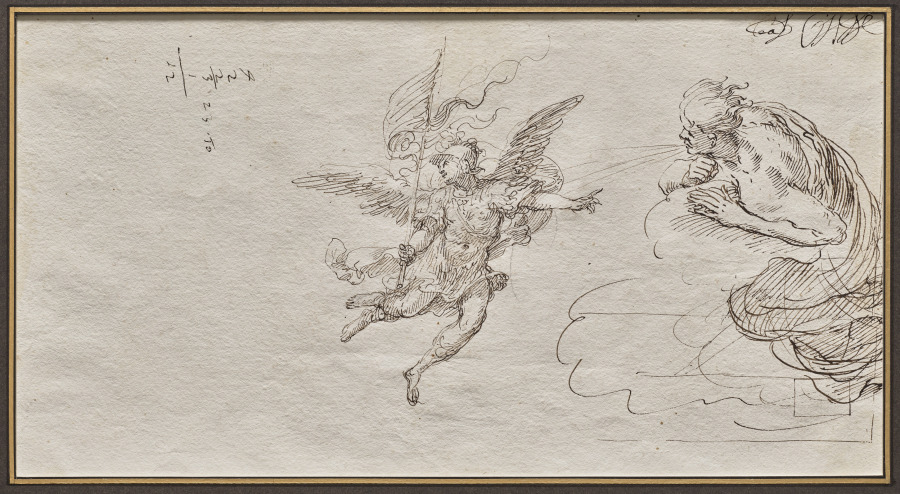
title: Studies of an Archangel and a Wind God (verso)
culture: Italy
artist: Massimo Stanzione (Italian, 1585–1656)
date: c. 1620s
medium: pen and brown ink (verso),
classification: Drawing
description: Massimo Stanzione worked in the Spanish-held Kingdom of Naples, where, during the 1600s, painting was characterized by dramatic expression, emphatic naturalism, and intense chiaroscuro derived from the profound influence of Caravaggio (1571–1610). Stanzione, however, was known in the city as one of the main purveyors of a more classical style, a kind of antithesis to the passion and drama of such Neapolitan painters as Jusepe de Ribera. This drawing relates directly to a painting Stanzione made depicting the seven archangels at the Monasterio de la Descalzas Reales in Madrid. The iconography of the seven archangels was a regional focus of devotion in the Neapolitan kingdom, and in Spain, where the cult of the “Seven Angelic Princes” had been promoted by the 16th-century Sicilian friar Antonio Del Duca (1491–1564).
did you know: The Archangel Michael is shown at the center of the composition, surrounded by six more archangels, from left to right, Gabriel, Uriel, Jehudiel, Barachiel, Selathiel, and Raphael.